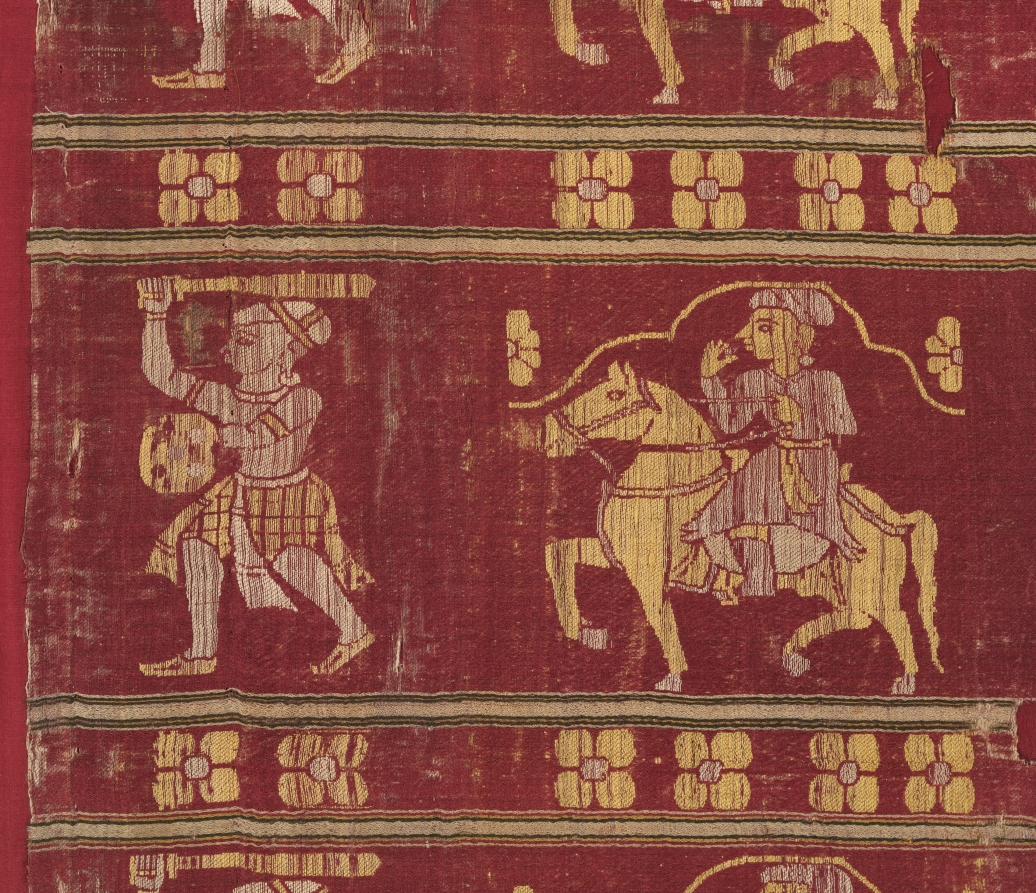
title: Tent Hanging (Part of a Larger Piece)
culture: India, Gujarat, Ahmadabad, 16th-early 17th century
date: 1560–1610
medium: Silk; lampas weave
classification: Textile